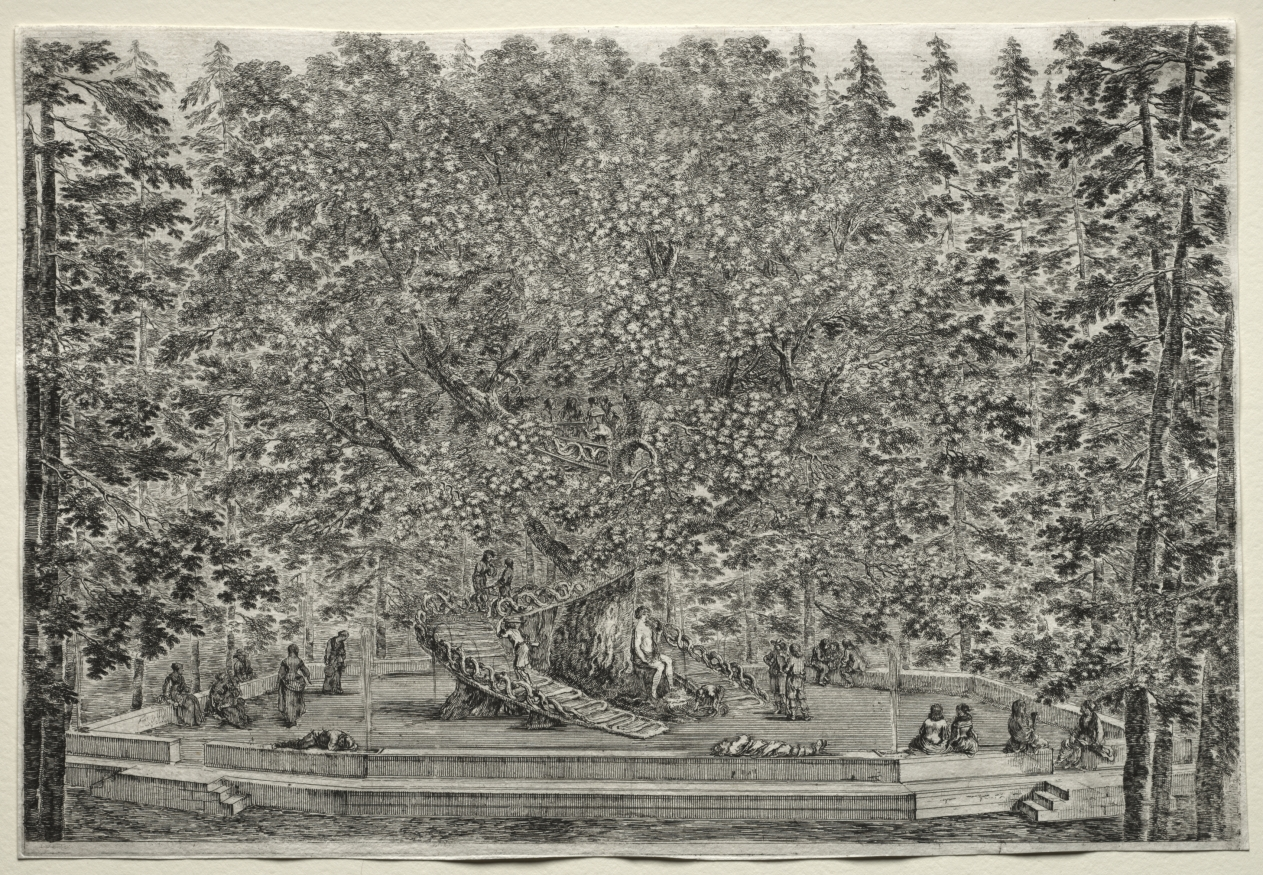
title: Views of the Villa of Pratolino: The Inhabited Tree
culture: Italy, 17th century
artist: Stefano Della Bella (Italian, 1610–1664)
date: c. 1653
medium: etching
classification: Print